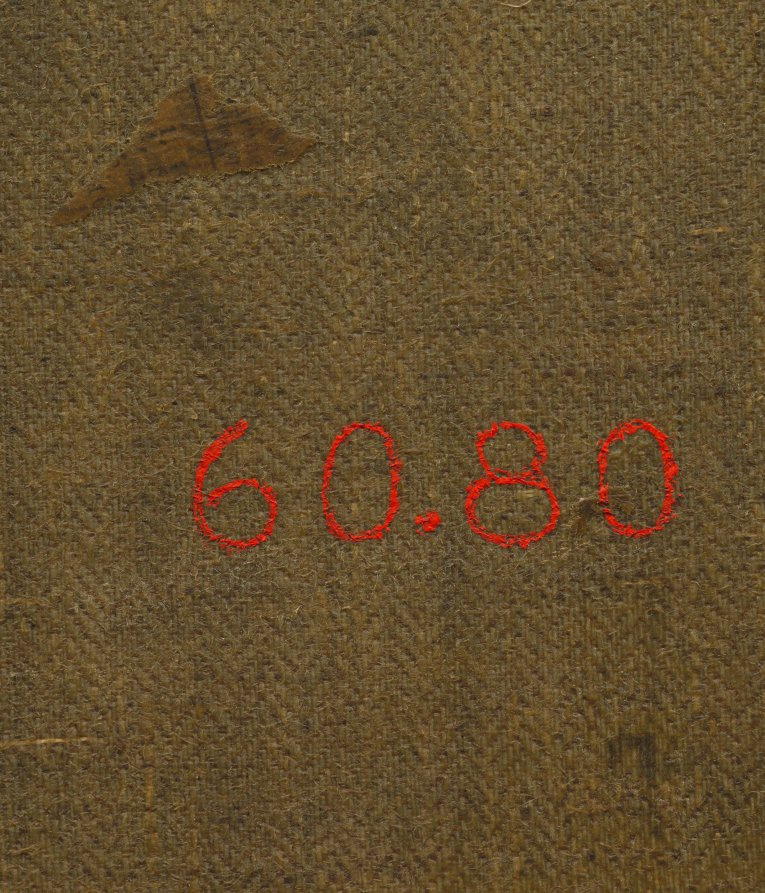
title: Silver Wine Jug, Ham, and Fruit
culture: Netherlands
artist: Abraham van Beyeren (Dutch, 1620/21–1690)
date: c. 1660–66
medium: oil on canvas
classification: Painting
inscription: Signed lower left: "AVB g. [monogram]"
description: With their typically large scale, and loose and energetic brushwork, Abraham van Beyeren’s opulent still life paintings were designed to be seen from a slight distance—perhaps installed over a mantelpiece. Here, for example, the silver wine jug is painted with rough strokes that seem almost abstract when viewed up close, but from a distance it becomes a fully realized object shimmering with complex reflections—including a ghostly self-portrait of the artist at his easel.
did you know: Look closely: the shimmering surface of the silver wine jug reflects a portrait of the artist at his easel.